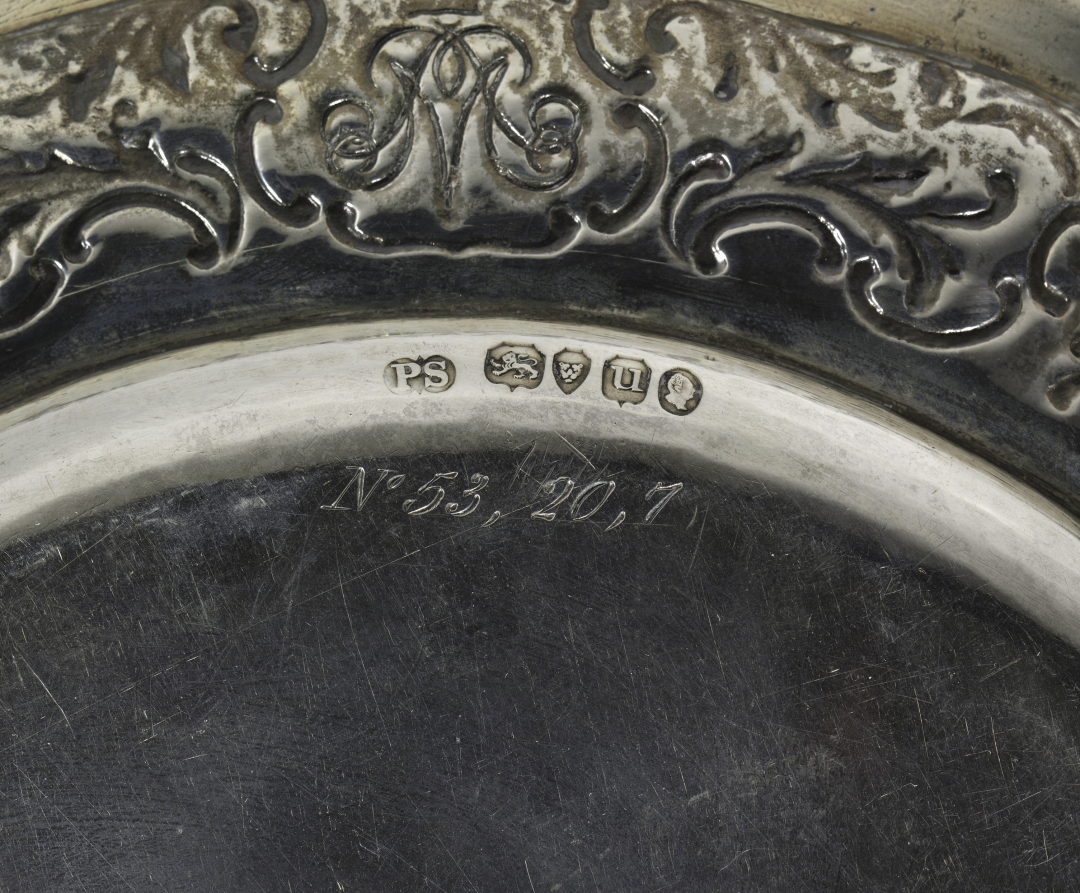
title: Plate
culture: England, 19th century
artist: Paul Storr (British, 1771–1844)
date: c. 1820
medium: silver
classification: Silver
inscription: Crest with a shield in the center and a falcon and deer on either sides of the shield, a crown and a possum. Banner reads 'UBIQUE, PATRIAM, REMINISCI'